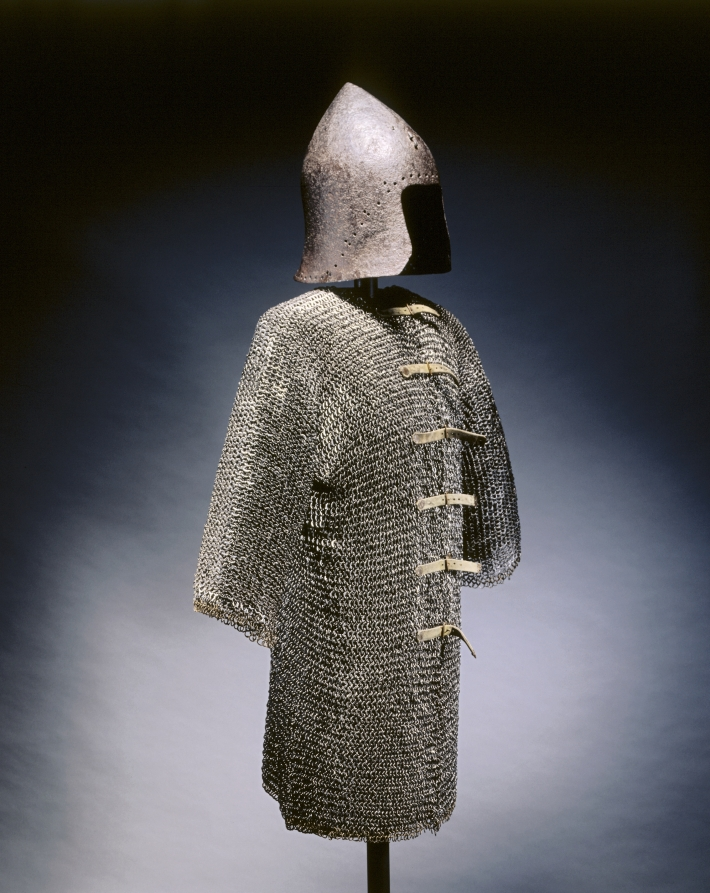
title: Barbute (from the Venetian Garrison at Chalcis)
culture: North Italy, 14th-15th century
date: c. 1350–1420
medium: iron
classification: Arms and Armor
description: This is a rare example of a type of helmet used from about 1350 to 1480. Its conical shape deflected glancing blows to the head. Italian chronicles refer to professional men-at-arms as barbuti. The word derives from the Italian barba, or beard, a reference to the hood of mail often attached to these early helmets. The row of small holes along the face opening and neck were for the attachment of the hood and lining.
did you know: This helmet and a number of others were apparently excavated from the Venetian garrison at Chalcis on the Greek island of Euboea.